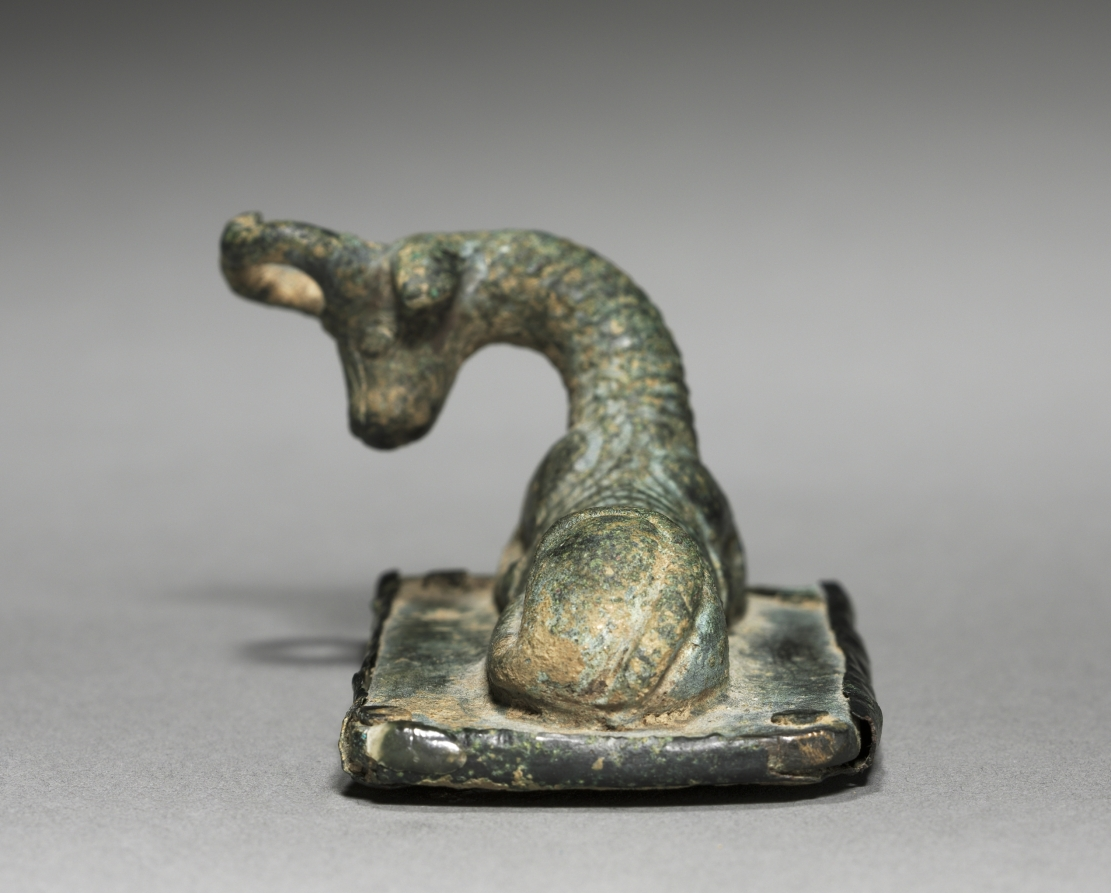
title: Recumbent Animal on Grater or Scraper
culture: Greece or Anatolia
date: 700–500 BCE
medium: bronze with iron grating plate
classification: Sculpture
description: An emaciated bull (or perhaps goat) lying on the ground, his legs tucked under in a resting position, may constitute a handle for this unusual object—likely a grater or scraper, judging from the perforated metal plate on its underside. The anatomically curious ridges across the neck and torso of the animal, as well as the large horned head turned perpendicular to the body, may have helped the owner grip the object while in use.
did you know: The exact use of this enigmatic object remains unknown.